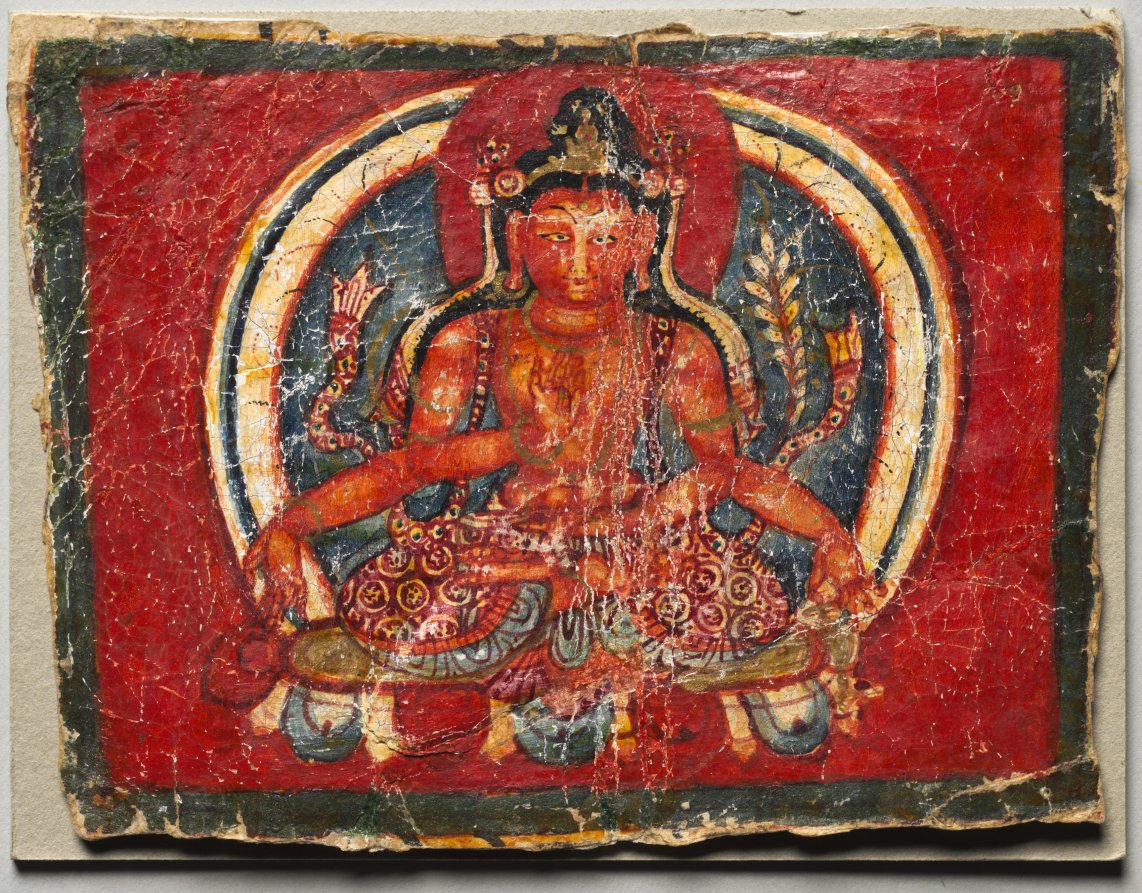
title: Four-armed Maitreya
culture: Western Tibet [or Kashmir (?)], Guge School (?), c. early 13th century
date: c. 1150–1200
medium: color and varnish on paper (manuscript fragment)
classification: Painting